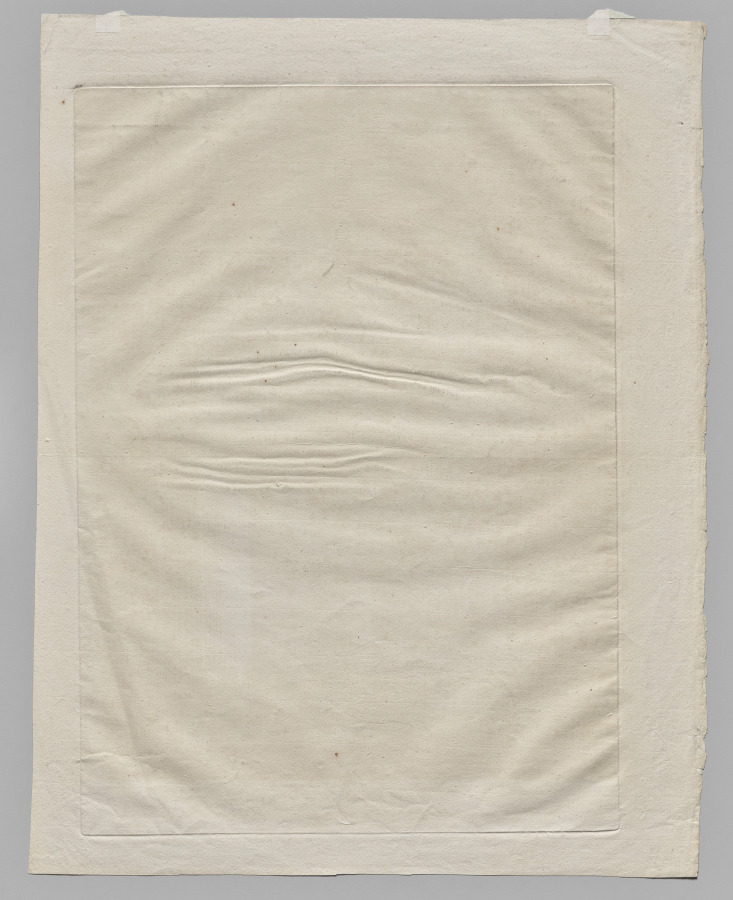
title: A View of the Vestibule of St. Peter at Rome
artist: Georges Francois Blondel (French, 1730–1800)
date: 1766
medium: mezzotint printed in sepia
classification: Print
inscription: Imprinted on recto: “A View of the Vestible ulf St. Peter at Rome”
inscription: Imprinted on recto: “G F Blondel Delin & Sculp”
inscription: Imprinted on recto: “To the Rt Hon’ble Elizabeth Countess of Northumberland This Plate is most Humbly Dedicated by her Ladyships most humble serv’t/Published according to Act by G F Blondel Panton Street/G F Blondel/Plate 3”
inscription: Watermark: Grand-Jésus stock of T. Dupuy, watermark Name of Jesus (IHS), countermark T Dupuy Fin Auvergne 1742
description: After returning from several years spent in Italy, the French printmaker George-Francois Blondel settled in London in order to take advantage of the English taste for images of Italian sites. This is one of a series of eight prints he published in 1766 depicting imagined and real Italian interiors. Using the relatively new technique of mezzotint, which creates velvety, dark tonal areas, as well as low vantage points, Blondel created towering, awe-inspiring spaces. For special patrons, he printed the plates in sepia ink, rather than in black; the CMA’s set includes two of these unusual sepia impressions.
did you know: Mezzotint was relatively new at the time this print was made and had yet to be utilized for such large plates of an architectural nature as seen here.